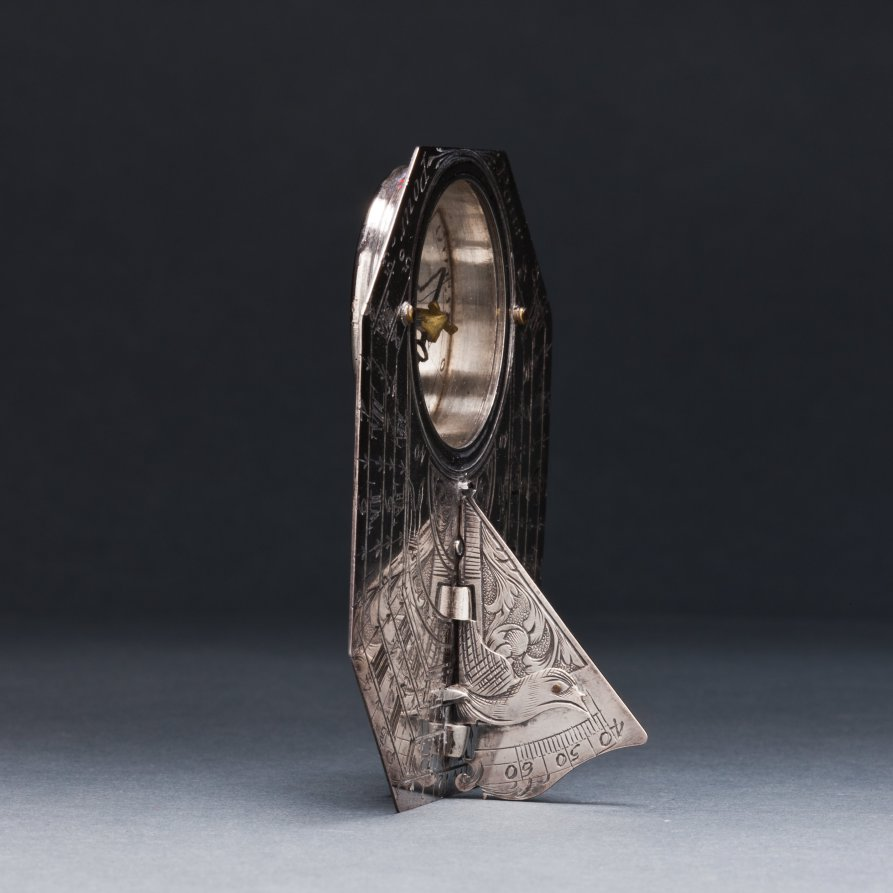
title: Butterfield Sundial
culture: France, 18th century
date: 1700s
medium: silver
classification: Silver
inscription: [Engraved signature above the compass in ribbon band]: "N. BION A Paris"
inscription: [Engraved on the face of the sundial]: “Pour 55° 4-5-6-7-8-9-10-11 50° IIII-V-VI-VII-VIII-IX-X-XI 45° 5-6-7-8-9-10-11 40° -VI-VII-VIII-IX-X-XI'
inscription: [Engraved on the other side]: "Pour 55° -8-7-6-5-4-3-2-1-0 50°-VIII-VII-VI-V-IIII-III-II-I 45°-8-7-6-5-4-3-2-1 40°-VII-VI-V-IIII-III-II-I"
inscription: [Engraved around the compass]: “NORD-OUEST-SUD-EST”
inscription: [Engraved on the back of the sundial]: “Turin 44 Milan 46 Paris 49 Lion 46 Metz 49 Rome 42 Liege 51 Naples 44 Namur 50 Gennes 44 Marseille 43 Grenoble 45 Bayonne 43 Bruxelle 51 Londres 52 Nantes 47 Vienne 48 Toulon 43 Tours 47 Lille 51”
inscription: [Engraved around the back of the compass]: “Venise 45 Strasbourg 49 Amsterdam 52 Hambourg 54 Varsovie 52 La Rochelle 46”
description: Butterfield-type sundials are characterized by their adjustable gnomons, metal flaps that cast a shadow on the dial’s face to indicate the hour, and geographical indices. This sundial has a scale adjustable between latitudes of 40° to 60° north. The latitudes of 26 European towns are engraved on its back for quick reference. With an intricately engraved silver face, it would have functioned as a fashionable traveler’s accessory.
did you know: Butterfield-style sundials were named after Micheal Butterfield, an English scientific and mathematical instrument maker who worked in Paris between 1674 and 1724.